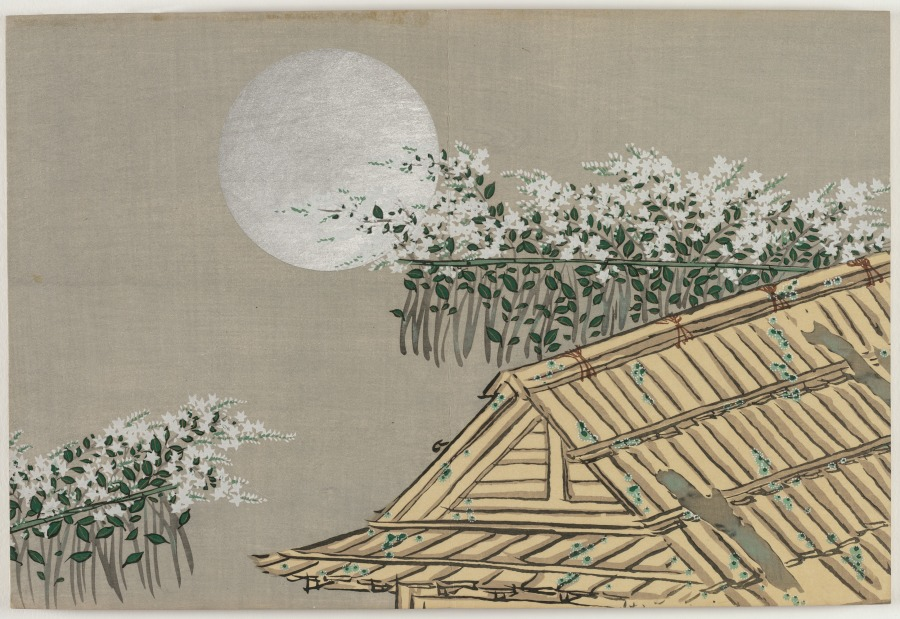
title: Flowers of a Hundred Worlds (Momoyogusa): Autumn Flowers (Aki no hana)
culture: Japan, Meiji period (1868–1912)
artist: Kamisaka Sekka (Japanese, 1866–1942)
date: 1909–10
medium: color woodcuts with gold and silver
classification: Bound Volume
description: This print from a set of three woodblock printed albums displays the graphic design prowess of Kamisaka Sekka. The images were first distributed one by one to subscribers to the series but later were reissued in bound form, like this book, for mass consumers. Each print features a vignette taken from nature or Japanese literature. Many of the scenes have a long history in Japan, originating in the 900s or 1000s and having been interpreted by all manner of artists since that time. Sekka’s selections hew closely to precedents from the Rinpa style originated by painter Tawaraya Sōtatsu (c. 1570–c. 1640) and calligrapher Hon’ami Kōetsu (1558–1637).